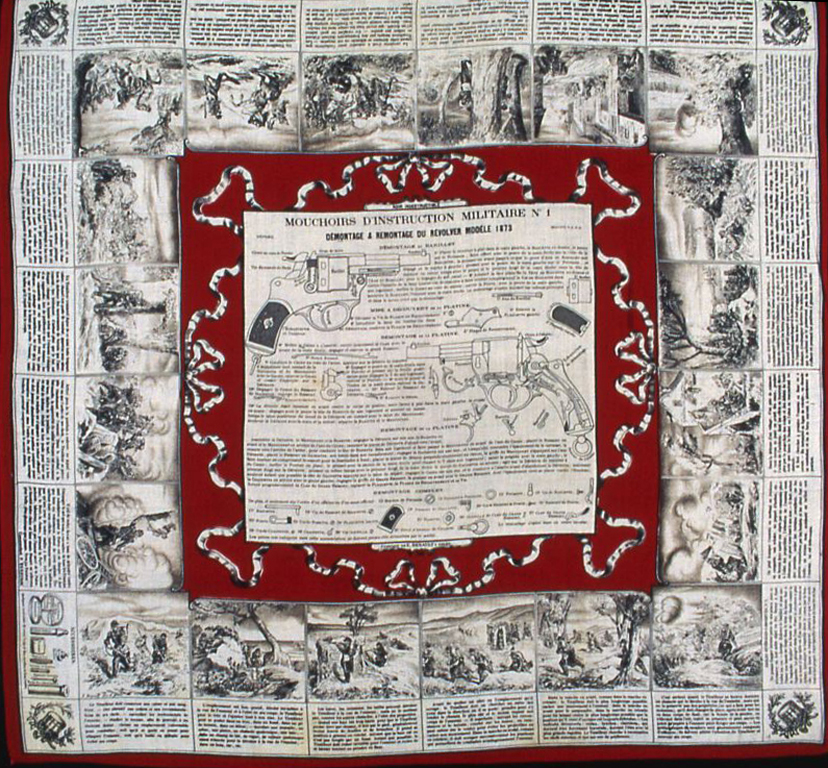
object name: Textile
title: Mouchoirs D'Instruction Militarie No. 1 (Handkerchief)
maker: Designed and engraved by Alexandre Buquet (French, 1802–1865); Manufactured by E. Renault; France, Rouen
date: 1850/1900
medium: Cotton, plain weave; engraved roller and block printed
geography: Rouen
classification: textile; weaving - printed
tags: propaganda